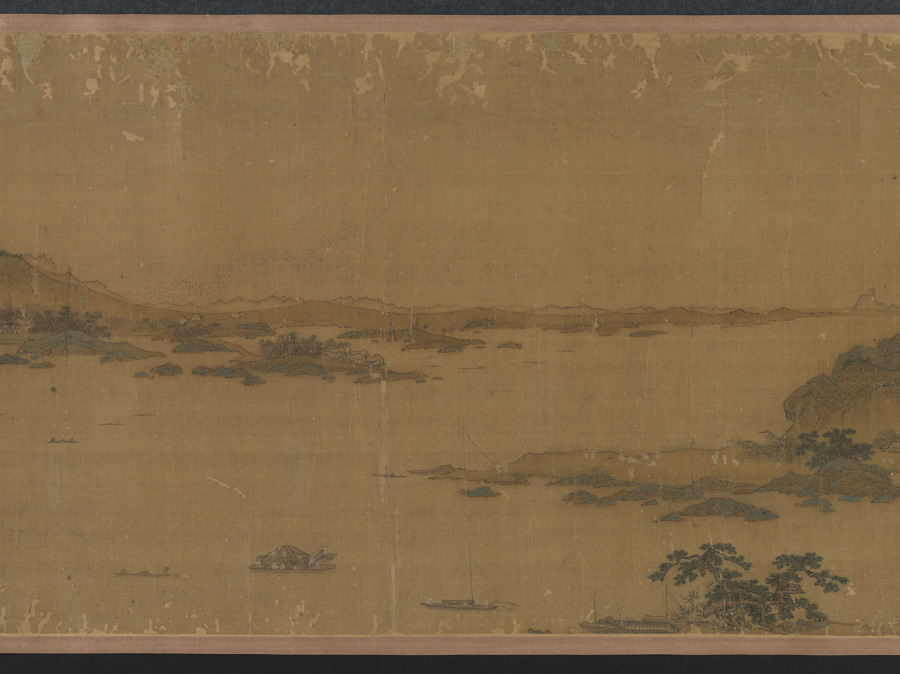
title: Waiting for the Moon in the Mid Autumn Festival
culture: China, Ming dynasty (1368–1644)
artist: Shi Rui (Chinese, c. 1400-c. 1470)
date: 1400s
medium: handscroll, ink, color, and gold on silk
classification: Painting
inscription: [印] 石氏以明; 游戯翰墨.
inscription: 僊山樓觀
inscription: 1 inscription, dated 1639, and 1 seal of Xiao Yuncong 蕭雲従 (1596-1673). Inscription by Xiao Yuncong: This is a painting by the Junior General Li. The painting is damaged and cracked at many places. Many of the paper strips for backing have been missing since long ago, but the colors are still fresh as if they had just been applied and the ink still looks moist. During the reign of Tianbao (742-756) of the Tang Dynasty, the Imperial Klansman Li Sixun was summoned to paint the walls of the Datong Hall. He was known as the "Senior General." His son, who came to be known as the "Junior General," was named Zhaodao. Of the stone epitaph [Li Sixun bei, or the "epitaph of Li Sixun," one of the best known calligraphic monuments of the Tang Dynasty], engraved with the calligraphy of Li Beihai 李北海 [Li Yong 李邕, 678-747], more than half has fallen off. Why, in contrast, was this painting able to survive? Or could it be that despite the fact that the stone is hard and the silk is soft, their preservation or destruction depends on some other factors? Moreover, since they were titled nobility of imperial descent, it is doubtful that they had the leisure and the mood to indulge in such decorative and descriptive blue and gold painting for the mere amusement of their fellow men. Recently, I read the Yi zhou ming hua lu 益州名畫錄 [by Huang Xiufu 黃休復, preface 1005]. I found a certain Li Chin-nu who compared himself with Li Zhaodao 李昭道 and was called by the Sichuan people the Junior General Li. In a painting which he did, entitled Mt. Ch'ing-ch'eng, the architectural structure of the pavilions, terraces, bridges, and boats are meticulous and accurate. The horsemen on a spring outing are as small as grain and the wild geese among the clouds as tiny as dust. It was also said that he painted on silk of any length in accordance to specific commissions. Is it possible that this painting is one of his? Since that time 700 years have passed. Yet one of the two Junior General Li's must be our painter. Formerly, there were the so-called "Four Excellents" in the Hall of Portraits of the Buddhist monk Wu-ta Kuo-shih: the [portrait] painting by Ch'ang Ts'an [act. ca. 881-888}, the calligraphy by Priest Tao-ying, the eulogy by Li Shangyin 李商隱 [813-858], and the landscape by Li Sheng [act. ca. 908-925]. This Li Sheng was styled Chin-nu and was also called Junior General Li. In the tenth month of the Chi-mao year, the twelfth year of the Chongzhen era [1639], recorded by Xiao Yuncong of Wuhu. trans. WKH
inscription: 4 colophons and 30 additional seals: 1 seal of Xu Qianxue 徐乾學 (1631-1694); 1 seal of Li Chien 黎簡 (1747-1799); 1 seal of Chang Chin-fang (18th c.); 2 seals of Sun Erzhun 孫爾準 (1770–1832); 1 colophon and 2 seals of Zhang Weiping 張維屛 (1780-1859); 1 seal of Wu Rongguang 吳榮光 (1773-1843); 1 colophon and 2 seals of Luo Tianchi 羅天池 (1826 jinshi); 7 seals of Wu Yanhui 伍元蕙 (active 1821–1851); 2 colophons and 4 seals of Pan Zhengwei 潘正煒 (1791-1850); 9 seals unidentified.